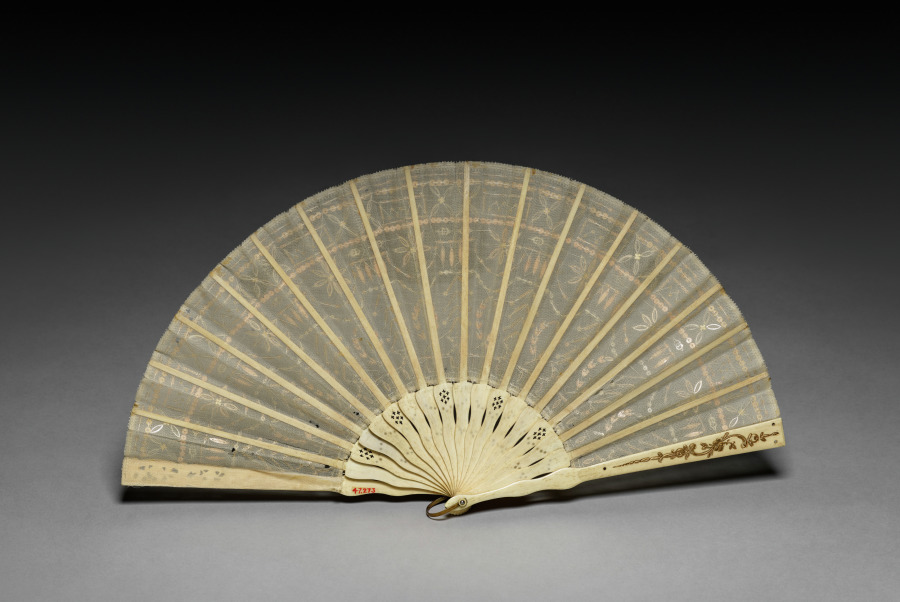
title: Fan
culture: 19th century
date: 1800s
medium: bone with gold paint, nickel (?) plated brass inlays, gauze with gold and silver colored sequins, copper alloy ring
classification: Miscellaneous